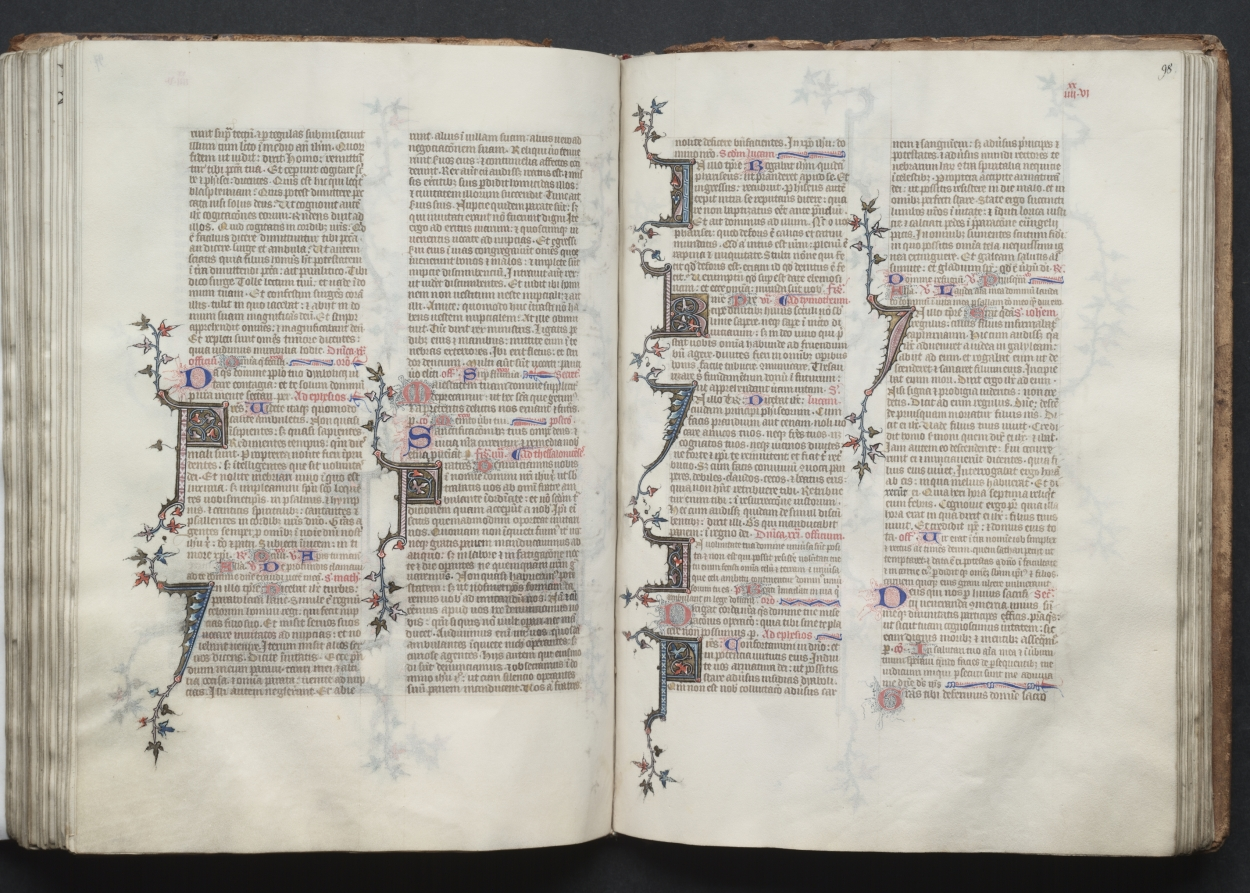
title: The Gotha Missal: Fol. 98r, Text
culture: France, Paris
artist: Master of the Boqueteaux (French)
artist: and Workshop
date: c. 1375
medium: ink, tempera, and gold on vellum; blind-tooled leather binding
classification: Bound Volume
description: The style and quality of this manuscript's decoration is typical of deluxe Parisian books made for aristocratic or royal patrons. Most of the book's decoration appears to be the work of the Master of the Boqueteaux, an artist active at the court of King Charles V (died 1380). His style was apparently shared by a number of book illuminators working in and around Paris. It is very possible that the Gotha Missal belonged to Charles V, but is not provable because the manuscript has no royal portraits and lacks a colophon. Given the book's magnificent decoration, however, it would seem that it was produced for a Valois prince, if not for the king himself. The manuscript receives its name from the German dukes of Gotha, its later owners.